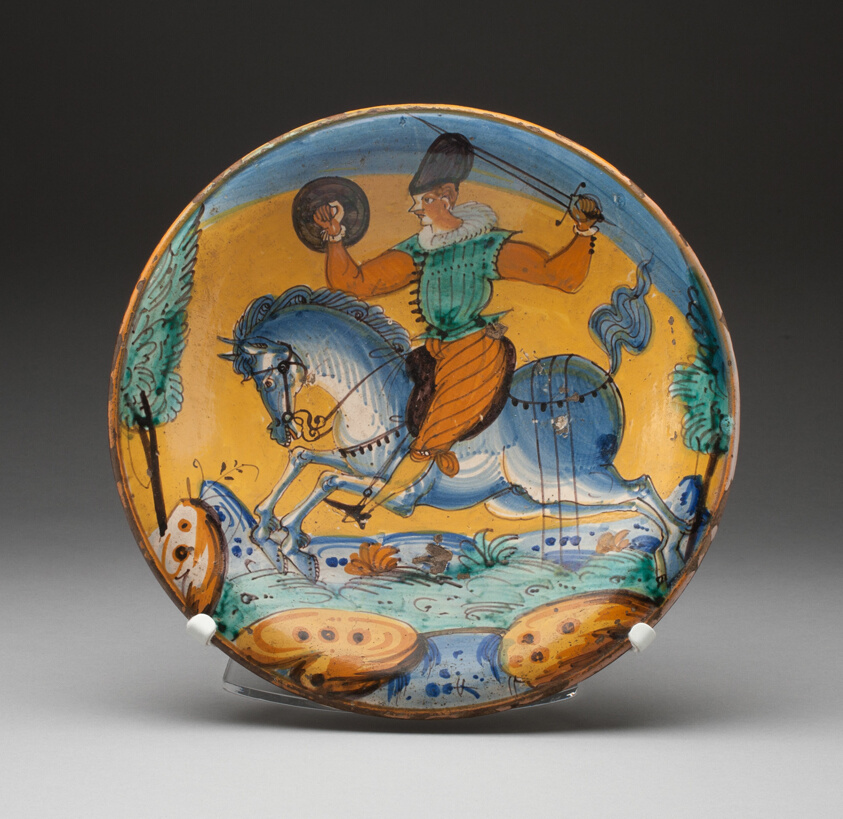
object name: Ceramics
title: Plate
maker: Italy, Montelupo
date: c. 1620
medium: Tin-glazed earthenware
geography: Montelupo Fiorentino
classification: plate (general, dish); dish (vessel); earthenware; european decorative arts; ceramics